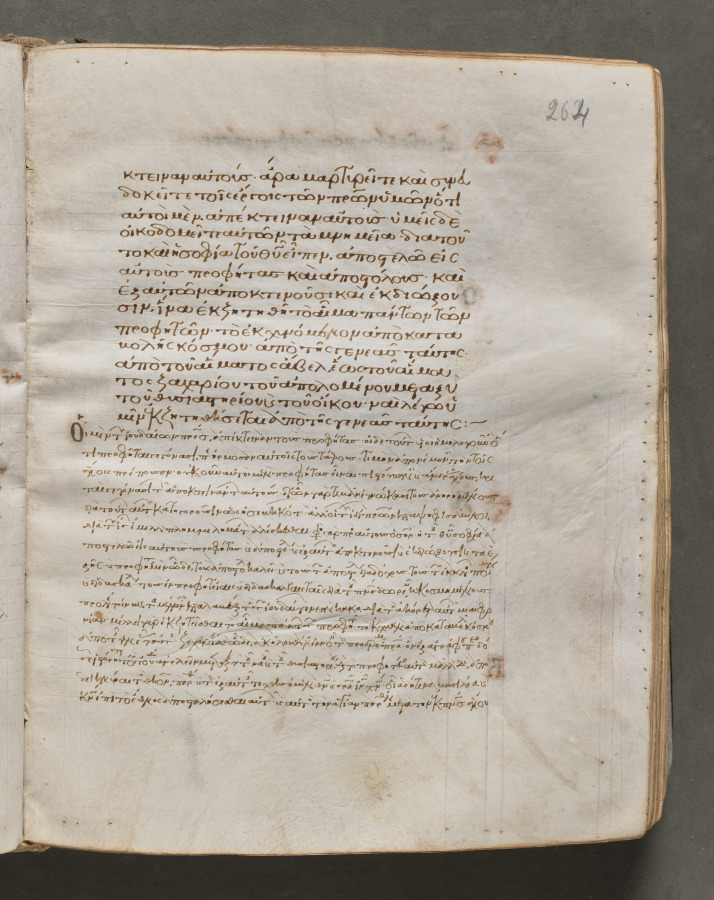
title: Text, folio 264 (recto), from a Gospel Book with Commentaries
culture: Byzantium, Constantinople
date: c. 1000–1100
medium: ink, tempera, and gold on vellum; leather binding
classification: Bound Volume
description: Each of the four gospels in this book opens on a page with brilliantly illuminated borders depicting the author of the text as well as birds—principally peacocks, symbols of the immortality of the soul—and fountains, representing the fountain of life and the salvation of the soul. This volume consists of 428 leaves with texts in Greek. Its level of sophistication suggests that it was probably written and decorated in a monastery in Constantinople.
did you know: Gospel books were carried in procession through Byzantine churches.